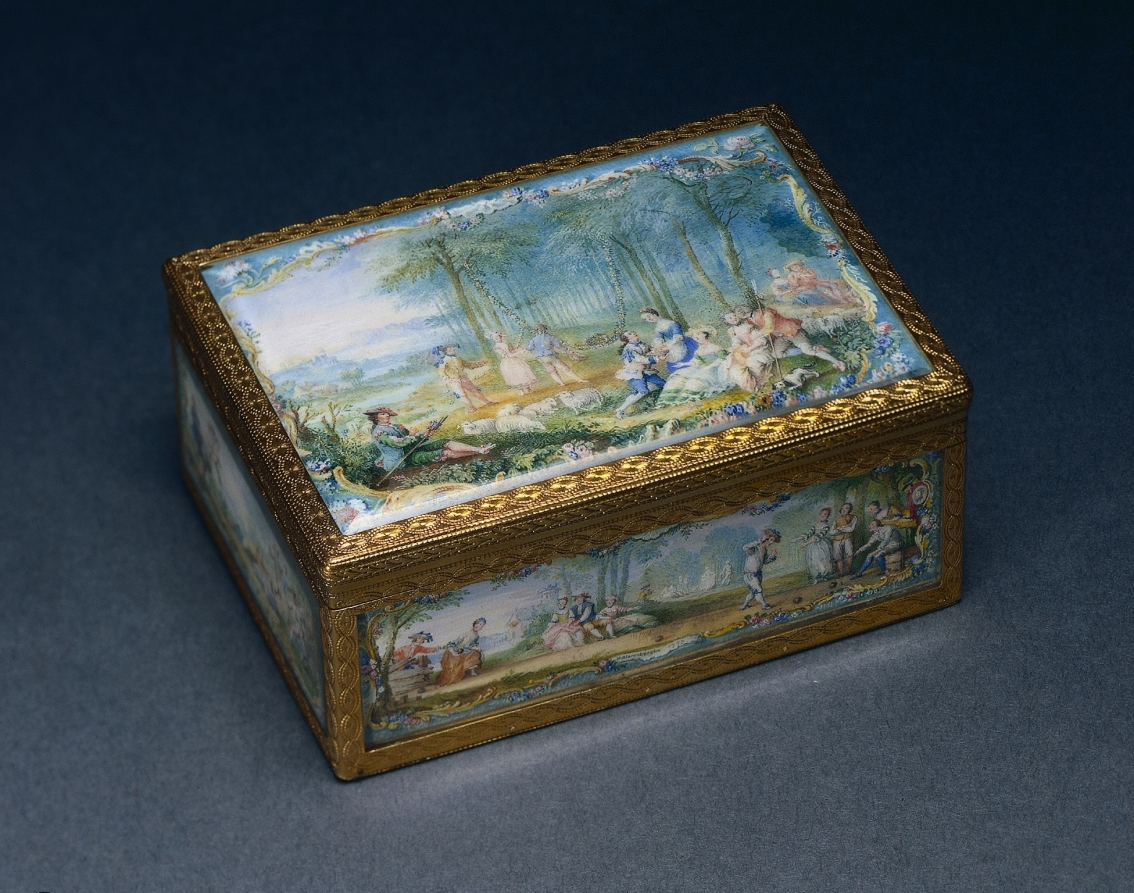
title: Snuff Box (Tabatière)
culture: France, 18th century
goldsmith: Jean Ducrollay (French, 1709–1787)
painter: Louis Nicolas van Blarenberghe (French, 1716–1794)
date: 1753–54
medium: gold and glass with miniatures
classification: Metalwork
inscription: [Maker's mark of Jean Ducrollay, master goldsmith in 1734, inside cover; bottom; right side]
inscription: [Charge mark of Julien Berthe, Paris, 1750-1756, inside cover; bottom; right side]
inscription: [Discharge mark of Julien Berthe, Paris, 1750-1756, on bezel]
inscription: [Inscribed on miniature, front side]: "V.[an] Blarenberghe/1753"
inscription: [Warden's mark for Paris, 1763-1754, inside cover; bottom; right side]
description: In 18th-century France ornately enameled boxes that held snuff—powdered tobacco—became a popular accessory in the French court. This object’s rectangular shape differs from early work attributed to Jean Ducrollay. Though the light colors, floral borders, and depictions of lively outdoor recreation are representative of earlier rococo imagery, the rectangular shape and simple frieze make it a primary example of rising neoclassicism.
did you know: The Ducrollay family was one of the most sought-after Parisian goldsmith workshops under the reign of French King Louis XV.